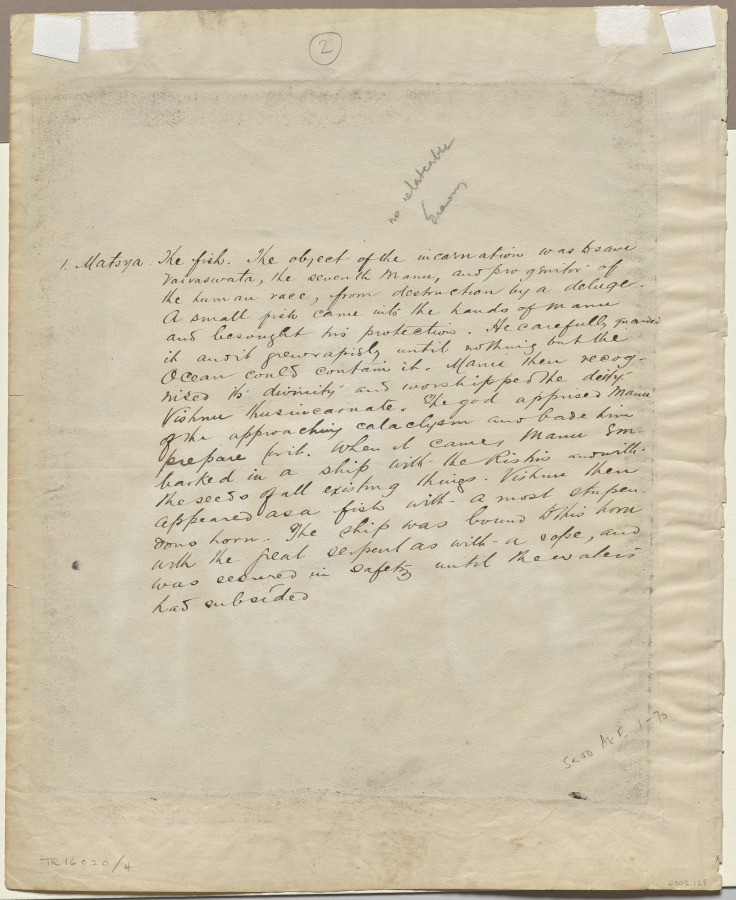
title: Worship of the Infant Krishna, from a Kalighat album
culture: Eastern India, Bengal, Kolkata, Kalighat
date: c. 1890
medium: Gum tempera, graphite, ink, and tin on paper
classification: Painting